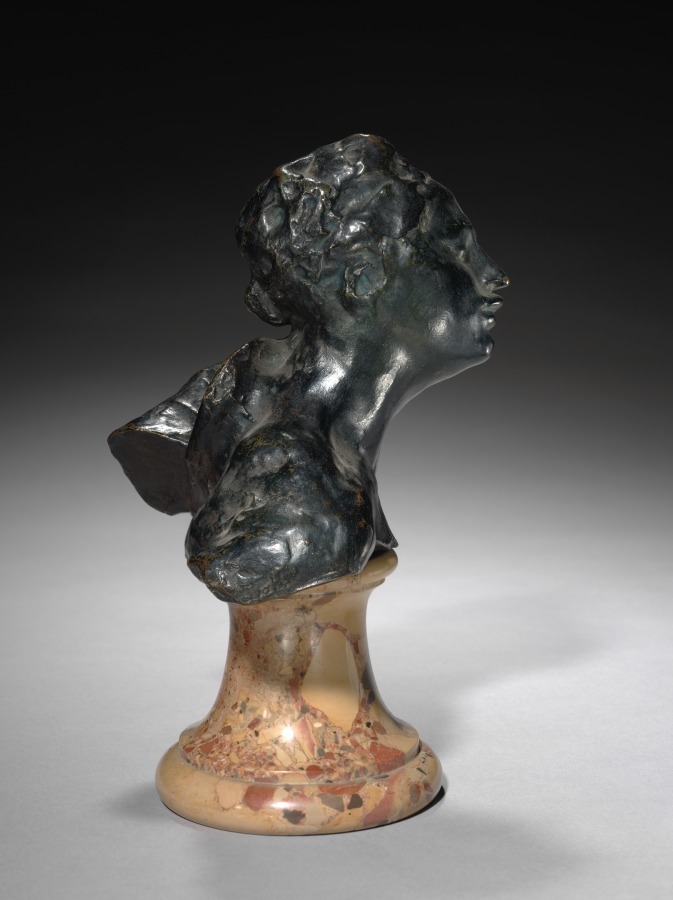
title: Head of the Little Martyr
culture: France, late 19th-early 20th century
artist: Auguste Rodin (French, 1840–1917)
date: c. 1880 – 1885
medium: bronze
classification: Sculpture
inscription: Signed sinister side: "A. Rodin"; inside front in relief: "A. Rodin"